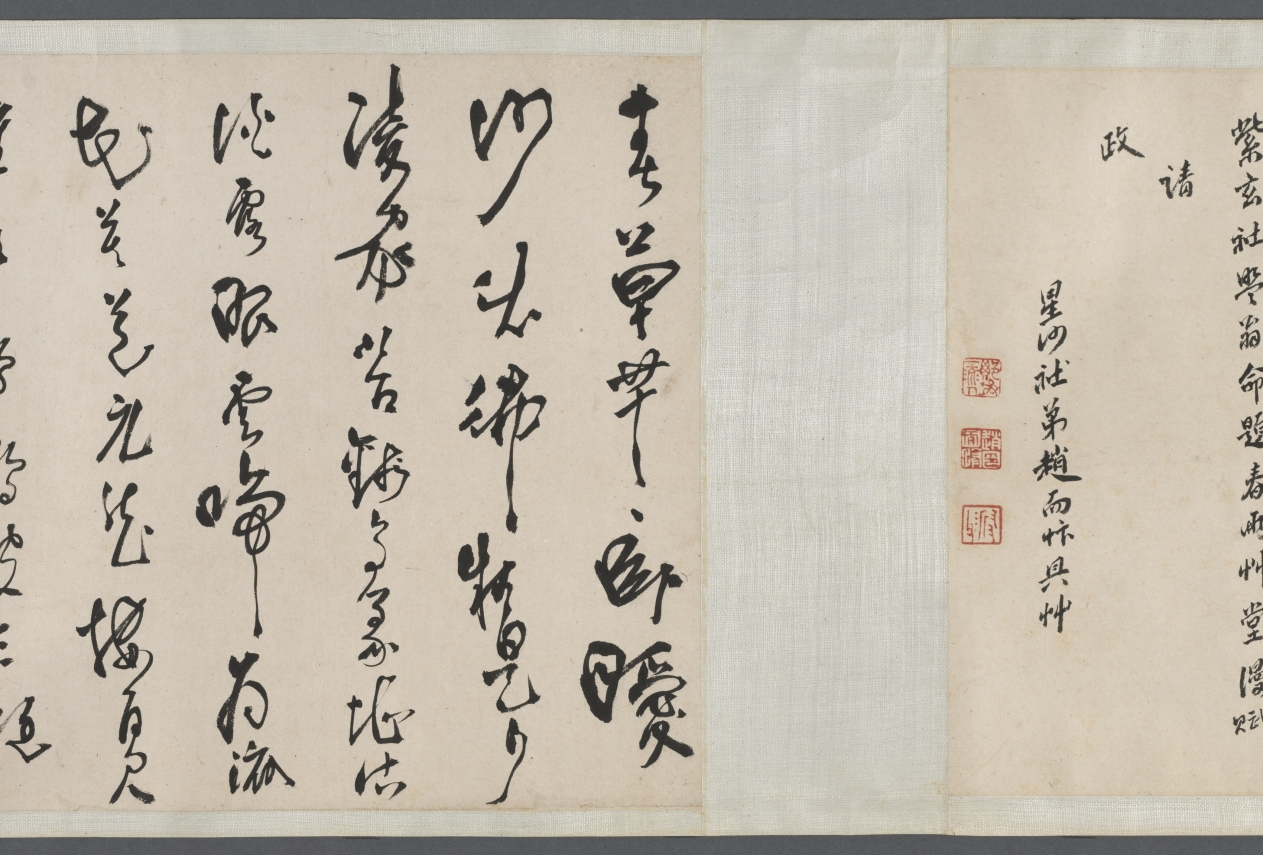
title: Spring Rain Thatched Hut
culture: China, Qing dynasty (1644-1911)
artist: Wang Jianzhang (Chinese, active 1621–1662)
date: 1650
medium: handscroll, ink on paper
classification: Drawing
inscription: Title by Wu Zhiying 吳芝瑛 (1868–1933), dated 1910.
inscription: 春雨草堂圖。庚寅仲春，為紫玄社兄畫於若耶溪上。 仲初王建章。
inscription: 12 colophons by Gong Weiliu’s 宮偉鏐 (1611–1680) contemporaries: Fang Gongqian 方拱乾 (1596–1667, jinshi of 1628); Jiang Cai 姜埰 (1607–1673); Liang Yizhang 梁以樟 (1608–1665); Du Shaokai 杜紹凱 (also named Du Jie 杜岕, 1617–after 1689), dated 1648; Zhao Kaixin 趙開心 (d. 1663), dated 1647; Zhao Erbian 趙而忭 (d. 1658); Yu Yaoguang 余耀光, dated 1649; Yao Quan 姚佺, dated 1648; Chen Taisun 陳台孫 (b. 1611, jinshi of 1640); (Monk) Shao 韶; Du Zhujin 杜祝進; and Tang Shi 唐時.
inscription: 此研田莊居士王建章為先太史紫元公所作春雨草堂圖也。居士字仲初，明崇禎間人，與先太史及惲香山相友善。喜畫佛像，自謂不讓李公麟。山水祖述董源，筆力雄健，有不可羈勒之概。香山稱其墨有五采，非世人所知。然性廉重，非同志不輕落筆，人得其寸圖尺縑，必相與忻賞，如獲蜼彝兕敦，非人世間物也！見先太史筆記，此圖寫雨景，而氣韻生動，勃勃於不能止。每一展覽，覺滿紙雲烟，墨瀋猶濕，如寫吾先人胸中未盡之邱壑也。圖後題詠，多一時名手，想見文采風流之盛。迄今二百餘年，舊德先疇，遺風未沫。吾子孫其永寶之，如與吾先人接謦咳於一堂，為感思之助，其敢作圖畫觀乎！同時香山亦有圖佚去己久，不知異日能為延津之合否。壬申長夏本昂重裝敬識。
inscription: Collectors' seals including: Gong Ben'ang 宮本昂 (1821–1874); Lian Qian 廉泉 (1868–1932); Wu Zhiying 吳芝瑛 (1868–1933)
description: With its striking simplicity, this painting captures the pure serenity of a private garden in the moist atmosphere of a spring morning on a small river. Painted in the style of Ni Zan, Wang Jianzhang dedicated this work to his patron-friend Gong Weiliu (1611-1680). Gong retired from government service after the fall of the Ming dynasty and constructed a garden-retreat at his native home in Taizhou, Jiangsu province. He invited scholars and poets from his literary society to contribute writings of his estate, which are here mounted together with the painting in this scroll.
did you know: Gong Weiliu, the owner of the estate portrayed here, had received his prestigious jinshi degree in 1643, but his official career was thwarted by the collapse of the Ming dynasty the following year.